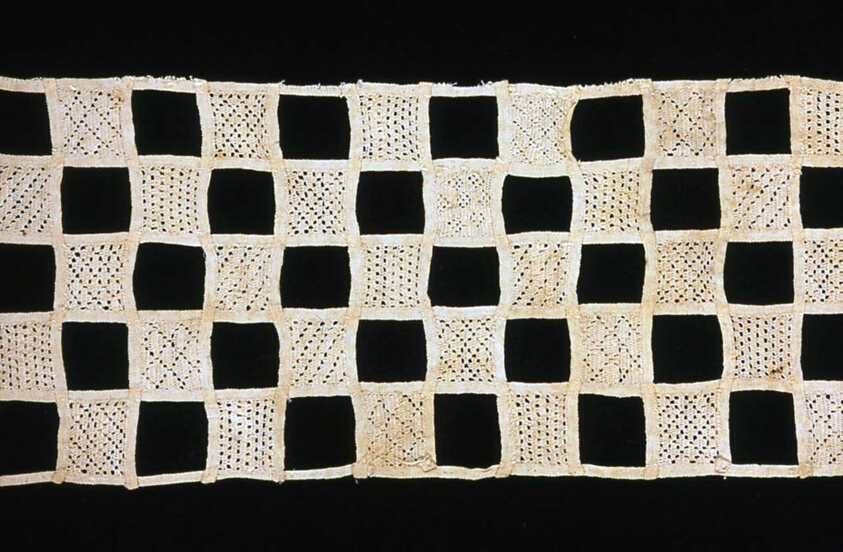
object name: Textile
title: Sampler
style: 17th Century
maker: Probably England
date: 1601/25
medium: Linen, needle lace with woven tapes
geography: England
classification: lace - needle; lace - mixed; lace; textile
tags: squares, grids